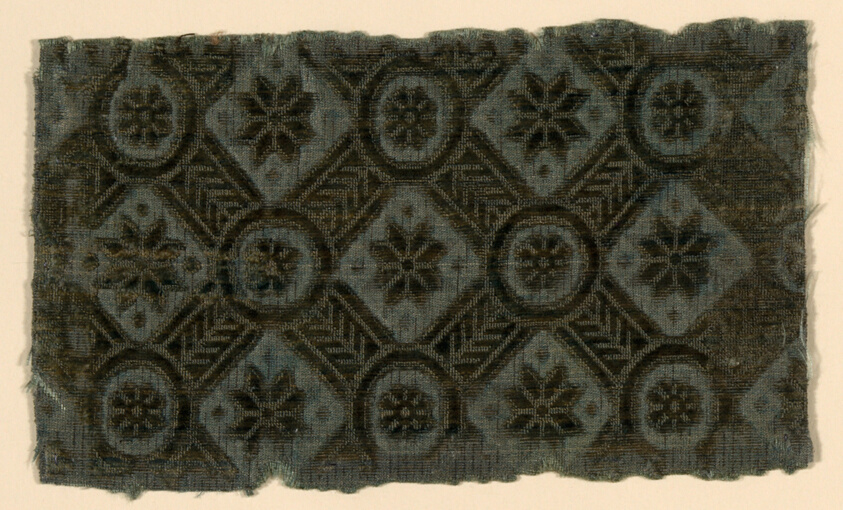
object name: Textile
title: Fragment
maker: Italy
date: 1575/1625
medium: Silk and gilt-metal strips, plain weave with supplementary facing wefts and supplementary pile warps forming cut and uncut voided velvet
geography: Italy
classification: textile; weaving - velvet; weaving